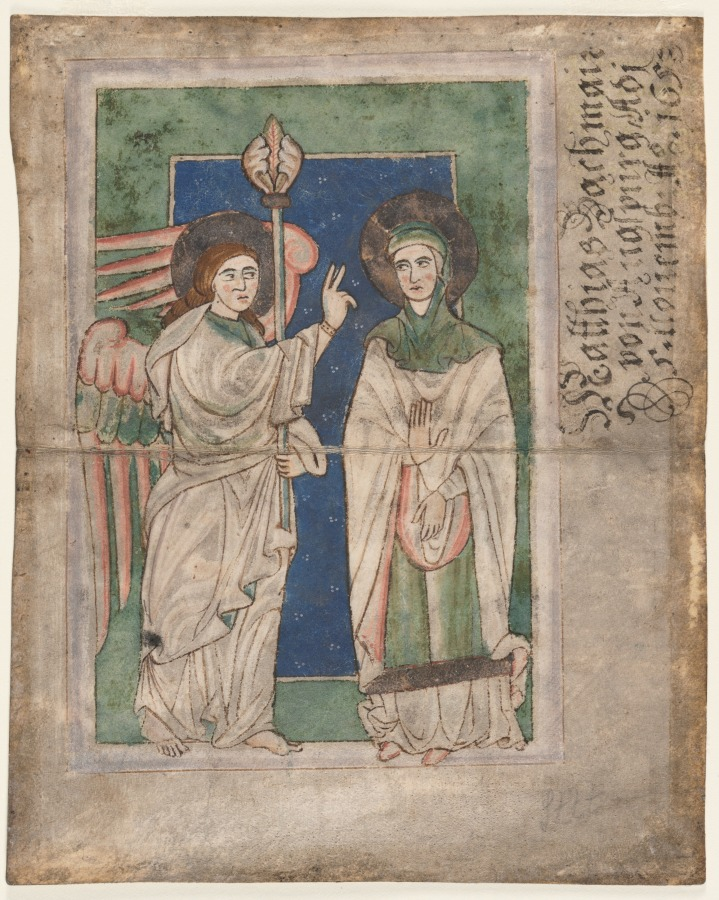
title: Leaf from a Psalter(?): Annunciation (recto); Nativity (verso)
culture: Germany, Bavaria (possibly Prufening or Augsburg), 13th century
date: early 1200s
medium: ink and tempera on parchment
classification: Manuscript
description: Psalters were commonly used in monasteries and convents during the Middle Ages; the exact origin of this detached psalter leaf, however, is unclear. Stylistically it relates to a small number of manuscripts produced at Prüfening Abbey near Regensburg and to other examples associated with scriptoria at Augsburg from the early 1200s. Though its immediate source remains obscure, it is certainly South German.